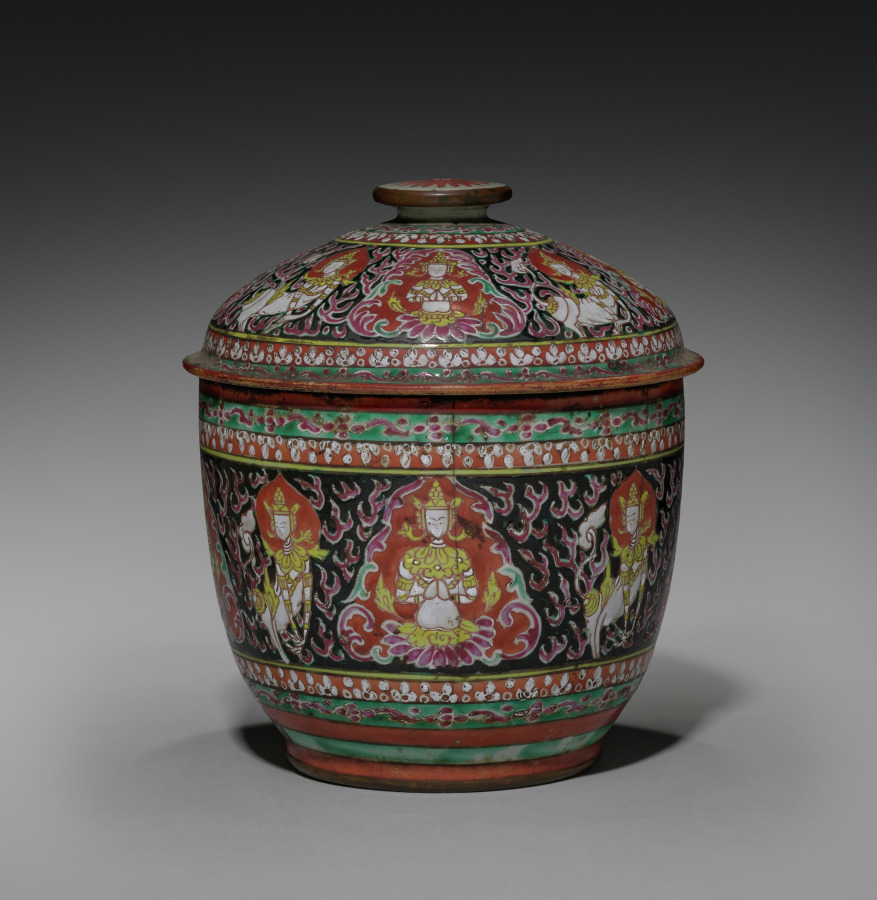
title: Jar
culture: Siam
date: 1800s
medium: porcelain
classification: Ceramic